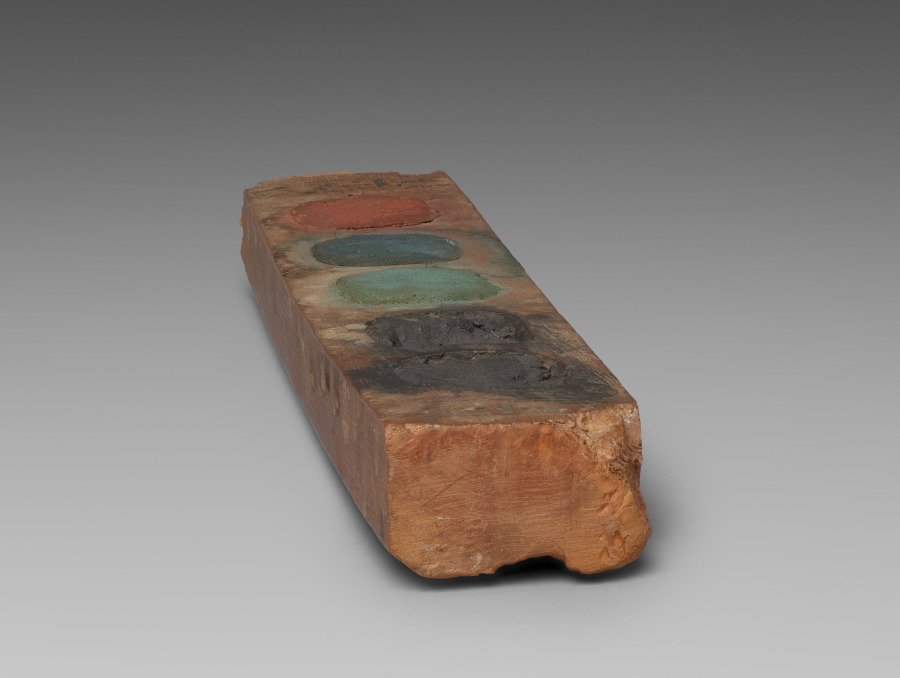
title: Paint Box of Vizier Amenemope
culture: Egypt, New Kingdom (1540–1069 BCE), Dynasty 18, reign of Amenhotep II (1425–1400 BCE)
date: c. 1427–1401 BCE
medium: boxwood with inscription inlaid in Egyptian blue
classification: Implements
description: This paint box still preserves its original cakes of pigment: one cake each of red (red ochre), blue (Egyptian blue), green (a mixture of Egyptian blue, yellow ochre, and orpiment) and two of black (carbon black, from charcoal). It belonged to Amenemope, who was vizier, or prime minister, under Amenhotep II. Amenemope probably used his paint box for recreation.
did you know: Painting was a popular and time-honored pastime among the upper classes in Egypt.